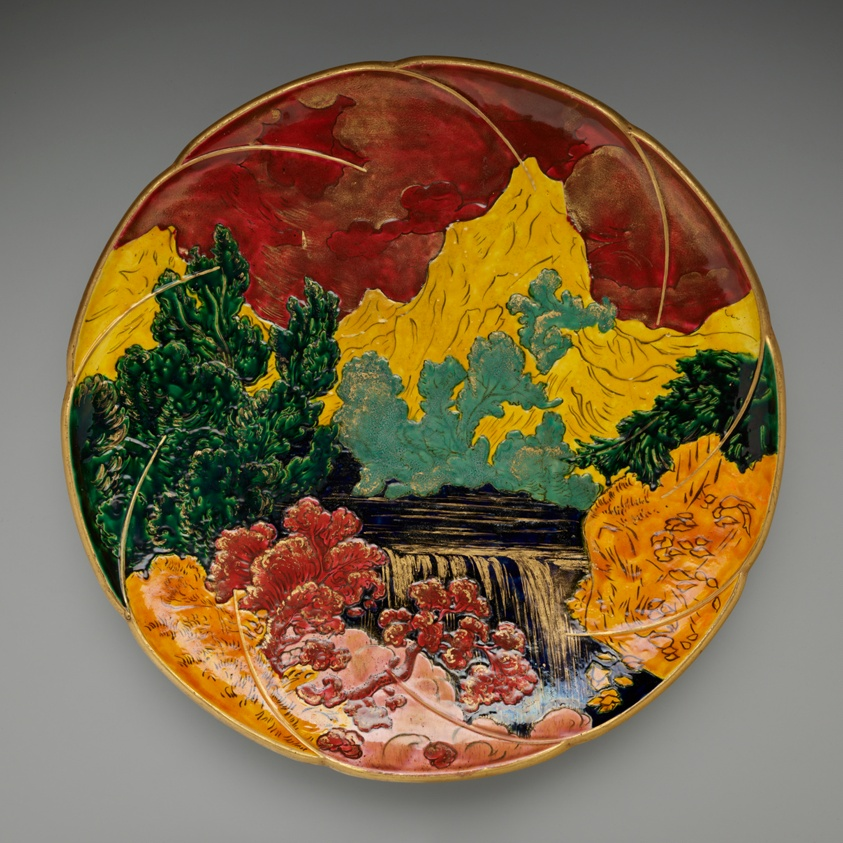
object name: Ceramics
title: Platter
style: japonism, 19th century, france, Impressionism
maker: Designed by Félix Bracquemond (French, 1833–1914); Made by Haviland & Co., Auteuil Studio, Paris (French, 1872-1886)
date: c. 1874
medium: Glazed earthenware and gilding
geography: Paris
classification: ceramics; dish (vessel); plate (general, dish)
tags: plates, impressionist, ceramics, mountain, waterfalls